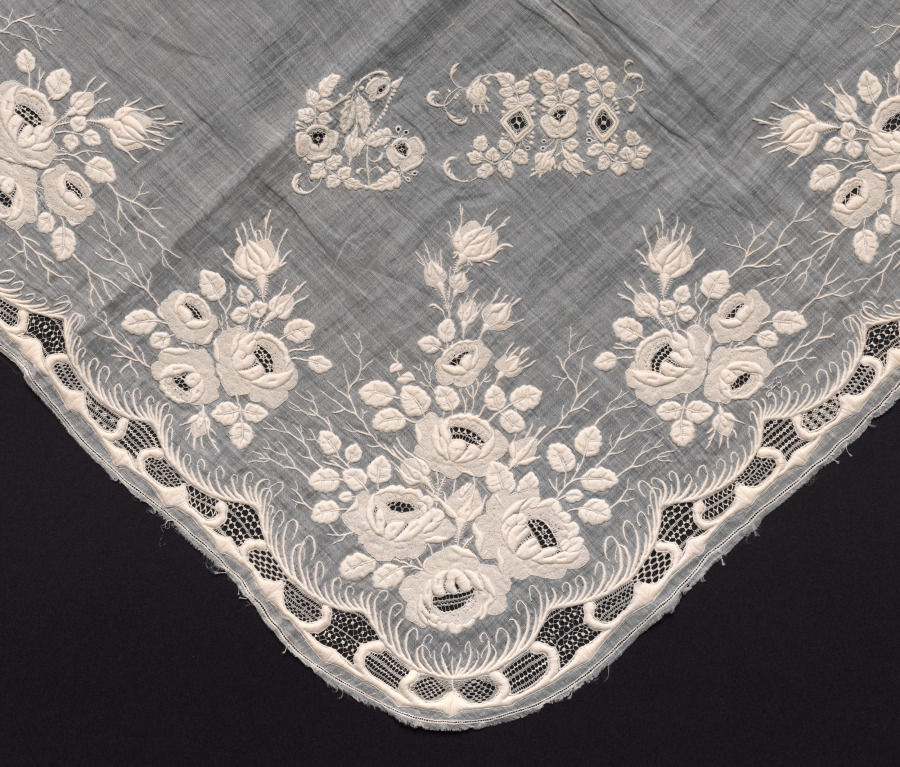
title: Lace Handkerchief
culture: France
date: 1800s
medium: Linen: needle lace (drawnwork) and embroidery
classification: Embroidery